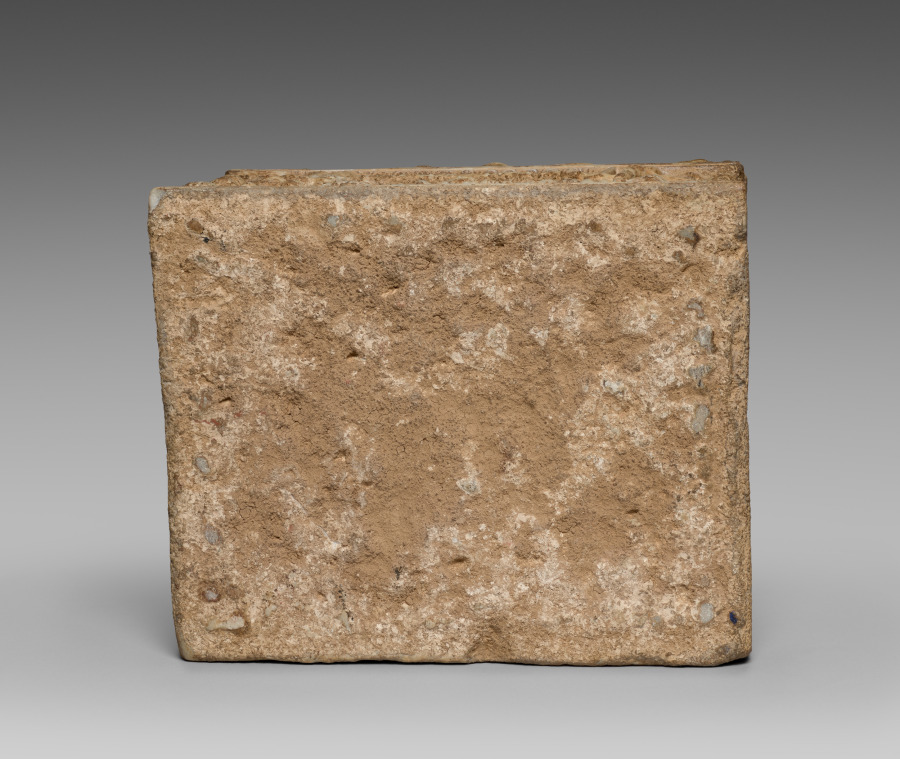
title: Cinerary Box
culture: Italy, Roman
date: 1–100 CE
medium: marble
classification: Sculpture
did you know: The central rectangular plaque would have been inscribed with an epitaph, either painted or carved.